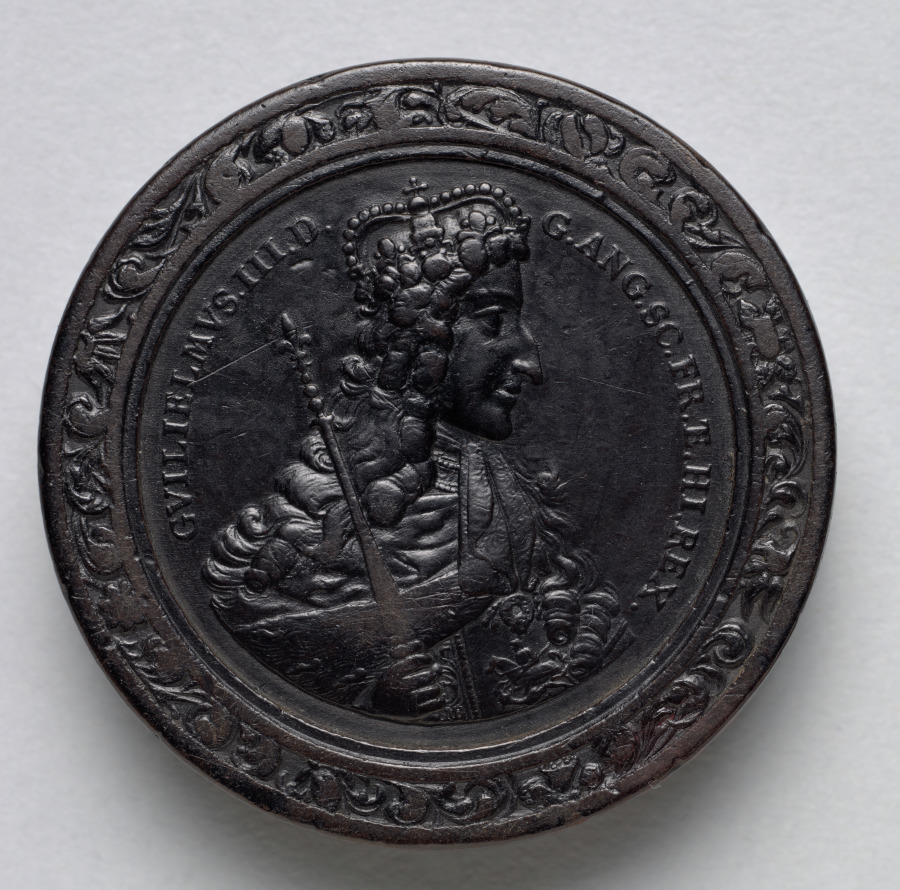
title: Gaming Piece (obverse)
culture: Germany, late 17th-early 18th Century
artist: Martin Brunner (German, 1659–1725)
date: c.1700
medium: wood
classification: Furniture and woodwork